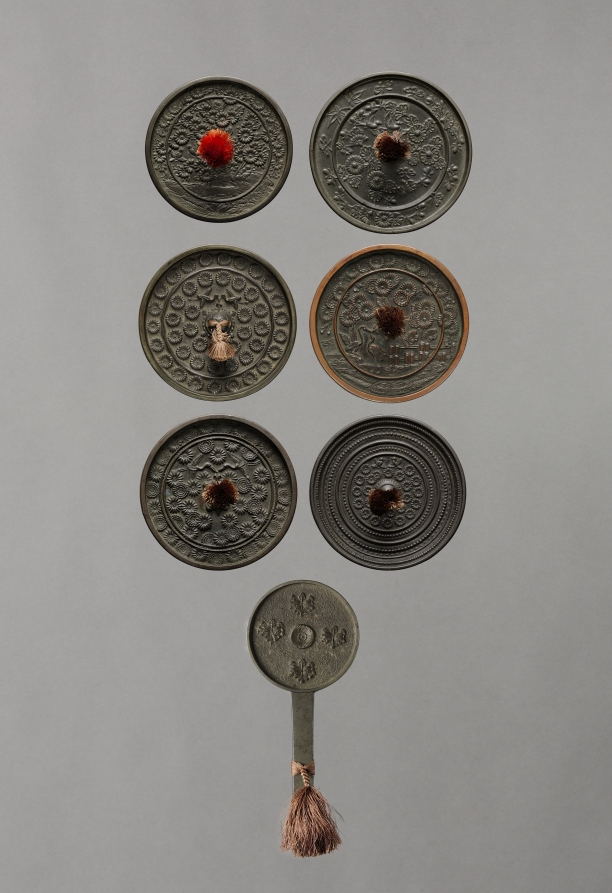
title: Mirror with Paulownia Crests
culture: Japan, Muromachi period (1392–1573)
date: 1392–1573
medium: bronze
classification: Metalwork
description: The Japanese used chrysanthemums as decorative elements on mirrors. In the Heian period, a chrysanthemum with cranes or long-tailed birds was a common motif. Later, in the Kamakura and Muromachi periods, chrysanthemum designs were divided into three patterns with different symbolic associations: Chrysanthemum with Cranes represented longevity; Water Flowing suggested longevity as well as the Noh drama Kikujido, or Chrysanthemum Boy; and East Fence alluded to the poem "Drinking Wine" by Tao Yuanming (AD 365-427). Here, the mirror featuring Buddhist iconography (kyojo) and a chrysanthemum design on the back shows that the flower was also appreciated in the context of Buddhism in the Kamakura period.